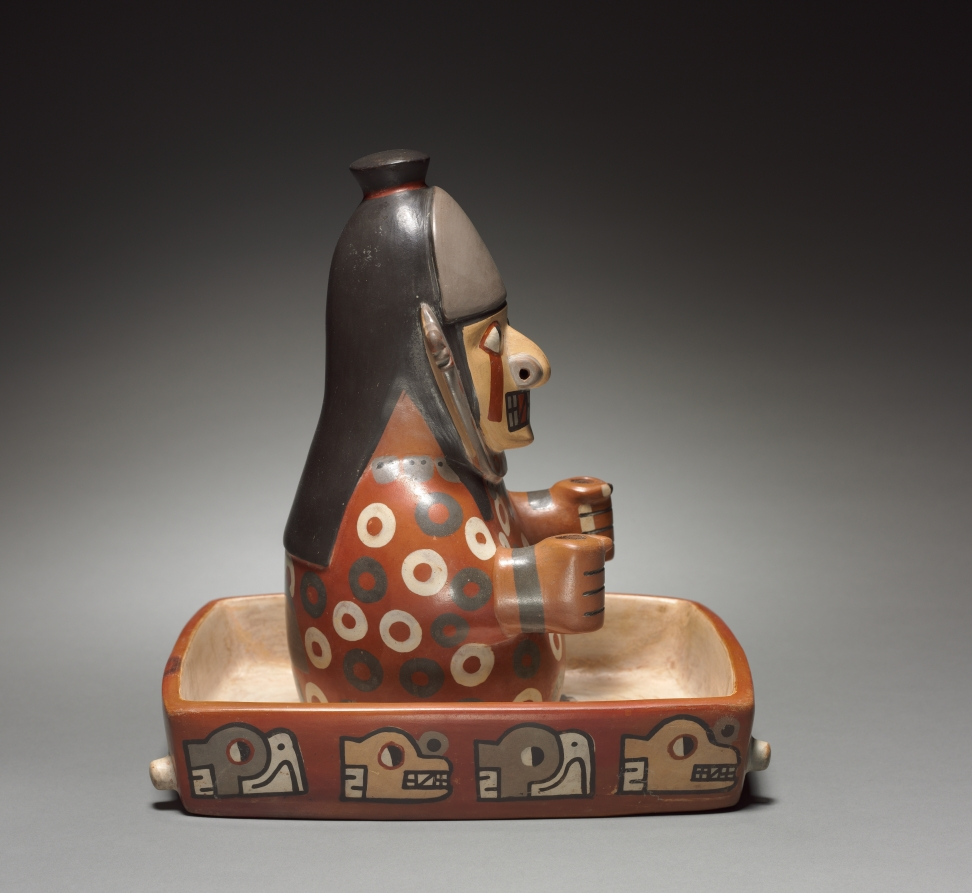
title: Figure in a Litter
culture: Wari (Pachacamac) style, Middle Horizon, Epoch 2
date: 500–900 (Thermoluminescence date, 590–1090)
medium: earthenware with colored slips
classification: Ceramic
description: Whether a deity, ancestral mummy, or masked human, this figure signals power. The divided eyes and fangs are traits of supernatural beings. The hands are cupped around holes that once perhaps held staffs, symbols of human and divine authority. And the litter was a mode of travel reserved for those of high station; the knobs refer to poles that rested on the shoulders of human bearers.